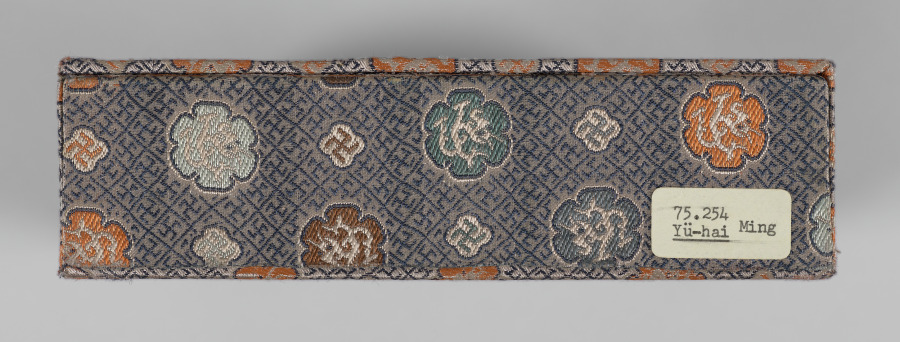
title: Yu-hai (Ocean of Jade) woodblock bound volume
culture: China, Ming dynasty (1368–1644)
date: 1368–1644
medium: woodblock-printed book with painted edges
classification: Bound Volume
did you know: When each book is rolled to form a cylinder, a landscape appears on the edges, painted in ink and washes of color.